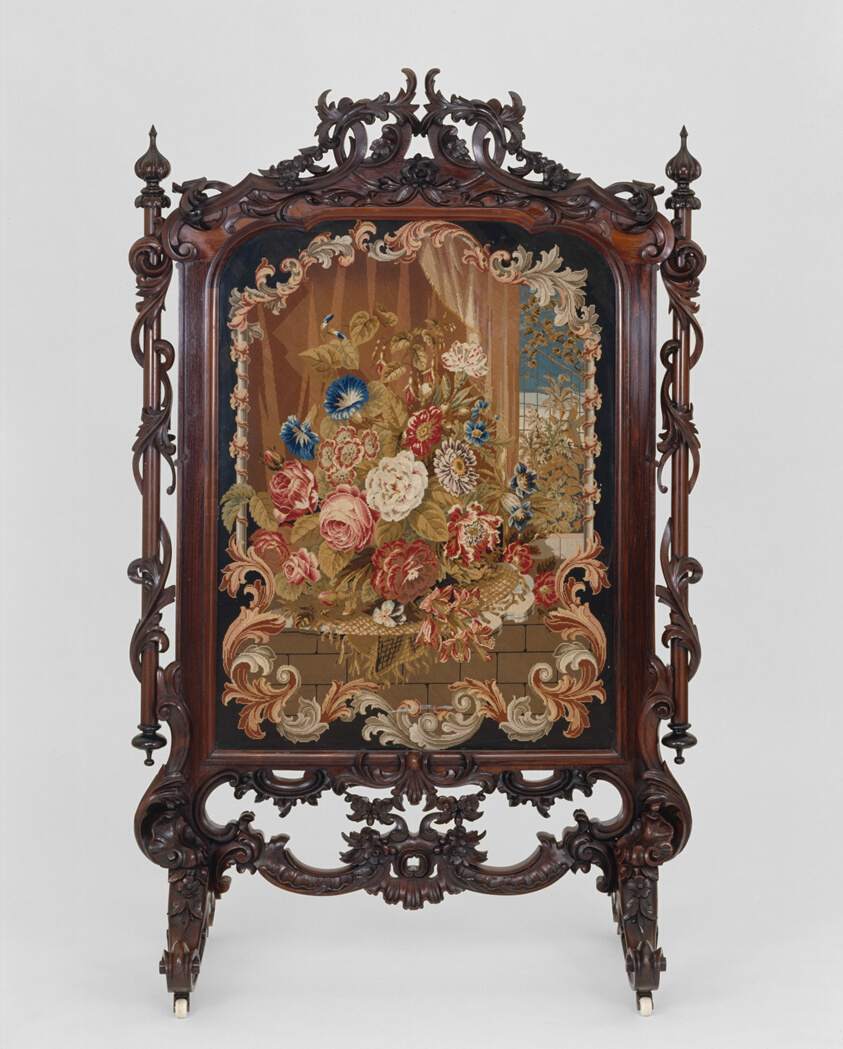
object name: Decorative Arts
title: Fire Screen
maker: Artist unknown (American, 19th century); New York or Boston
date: c. 1855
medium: Rosewood and white pine with needlepoint panel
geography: New York City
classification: furniture accessory; american decorative arts; american arts; decorative arts